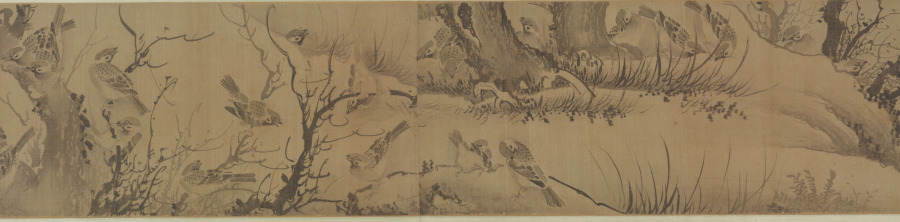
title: A Hundred Sparrows in a Lofty Grove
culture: China, Ming dynasty (1368–1644)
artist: attributed to Lin Liang (Chinese, 1416–1480)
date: 1368–1644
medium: handscroll; ink on silk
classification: Painting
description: Sparrows engaged in all kinds of activities frolic amid leafy branches, blades of grass, rocks, and a waterfall. As our eyes move over the scroll, the artist engages us in enjoying the sparrows’ carefree movements in a natural setting. The charming birds were painted from close observation in swift and fluent brushstrokes. Sparrows are a common bird and in Chinese painting they often represent the commoner in human society as opposed to the noble pheasant or peacock representative of the ruling class.